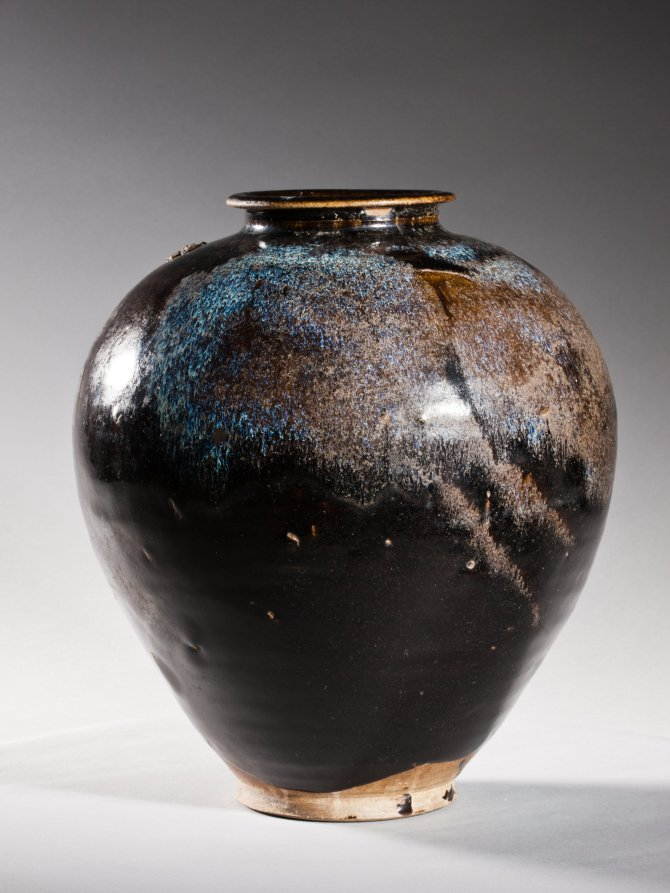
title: Jar: Black Ware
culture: China, Henan province, Huangdao kilns, Tang dynasty (618-907)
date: 700s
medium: glazed stoneware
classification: Ceramic